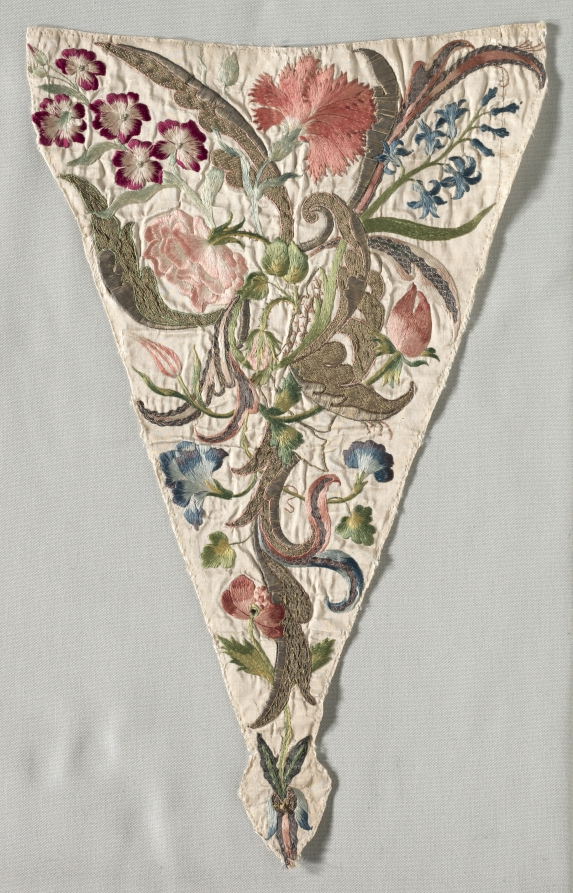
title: Stomacher (Devant de Corsage)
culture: Italy, 18th century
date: 1700s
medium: embroidery; silk and metal on satin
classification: Embroidery